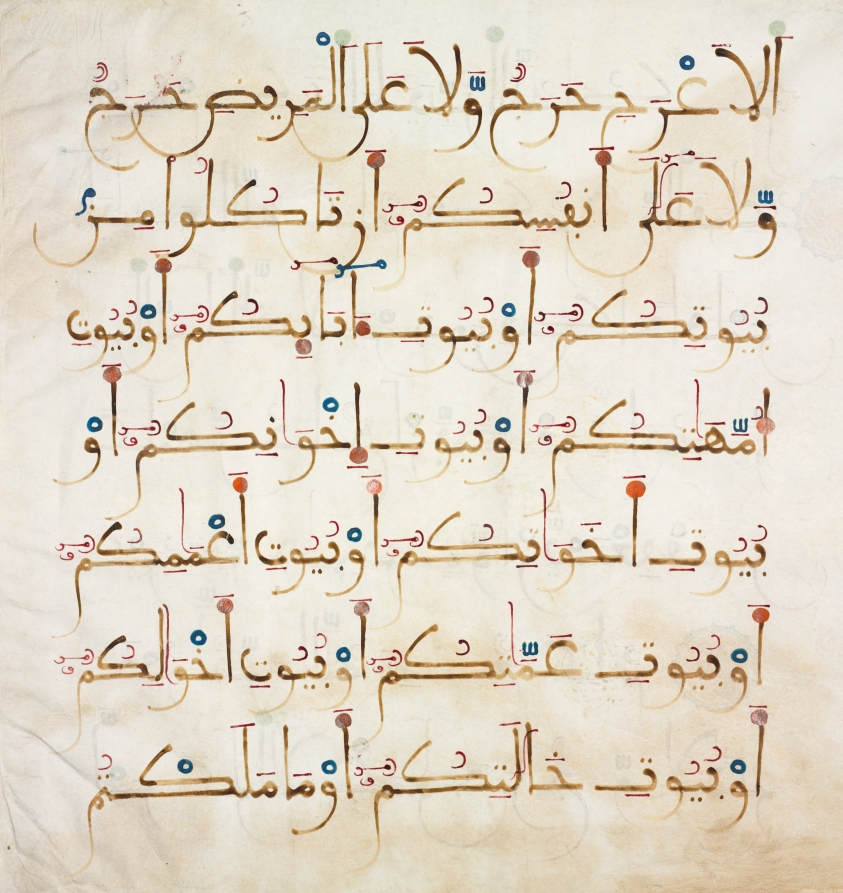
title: Qur'an Manuscript Folio (verso)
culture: Southern Spain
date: 1200s–1300s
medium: ink, gold, and color on parchment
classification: Manuscript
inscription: Sura-al Nur [Chapter:The Light] 24:part 61-part 61 (Arabic) Script: Maghribi (seven lines to a page)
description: This page from the “Chapter of Light” (24:59–61) in the Qur'an is written in the monumental script of Islamic Spain and North Africa, known as Maghribi Kufic. Words flow rhythmically with curving flourishes toward the left margin where letters end in almost perfect semicircles, an elegant hallmark that contrasts with the upright shafts. Distinctive markings—vowels in red and diacritics in blue—identify the vocalization of the text, which would have been read or recited aloud to an assembly.